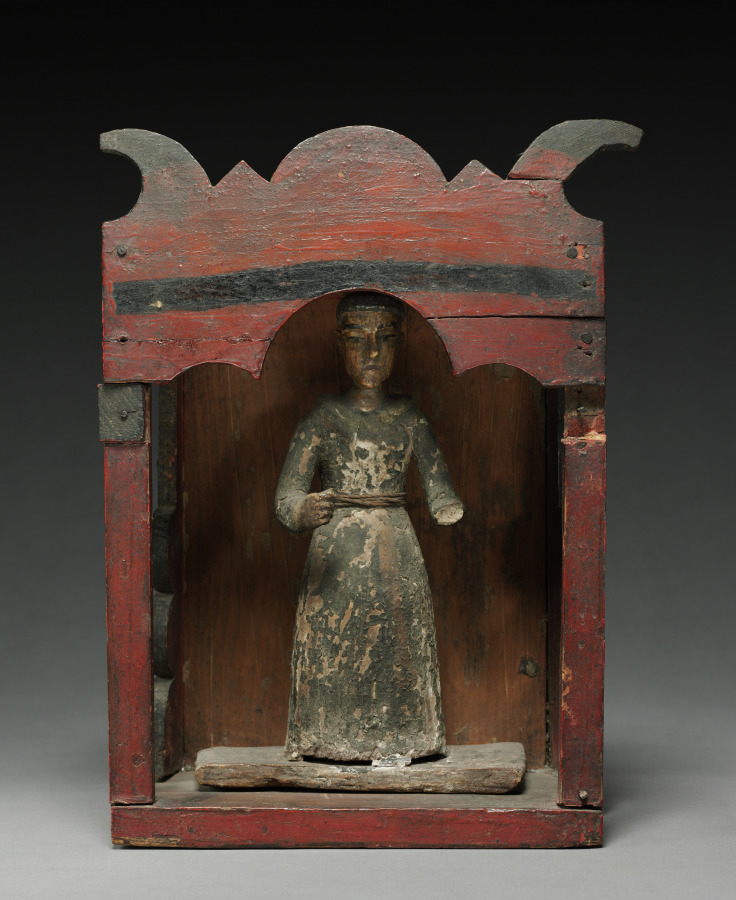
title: Figure with Nicho: santo de bulto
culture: America, New Mexico, 17th-18th century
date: 17th-18th Century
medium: painted wood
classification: Sculpture